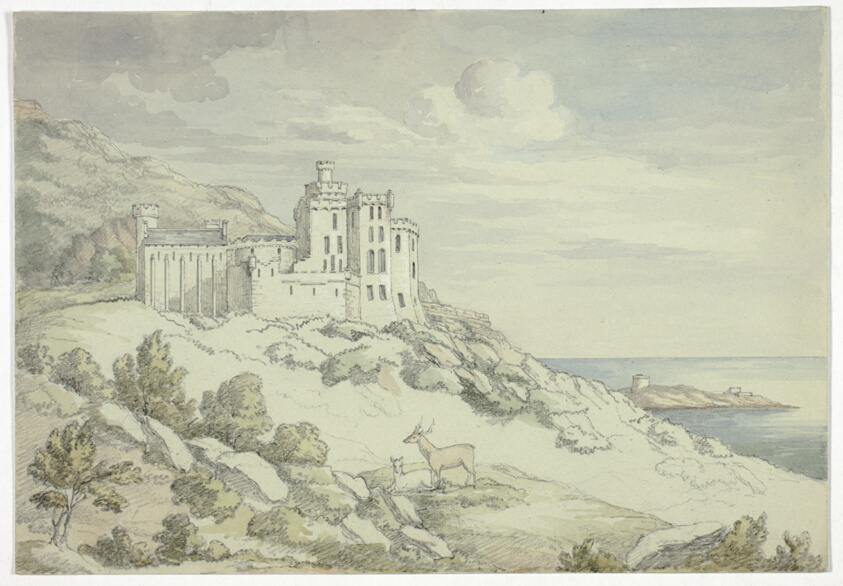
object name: Drawing and Watercolor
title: Victoria Castle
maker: Elizabeth Murray (English, c. 1815-1882)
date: 1843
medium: Watercolor over graphite on green-gray wove paper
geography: England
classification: watercolor; drawings (visual works); prints and drawing